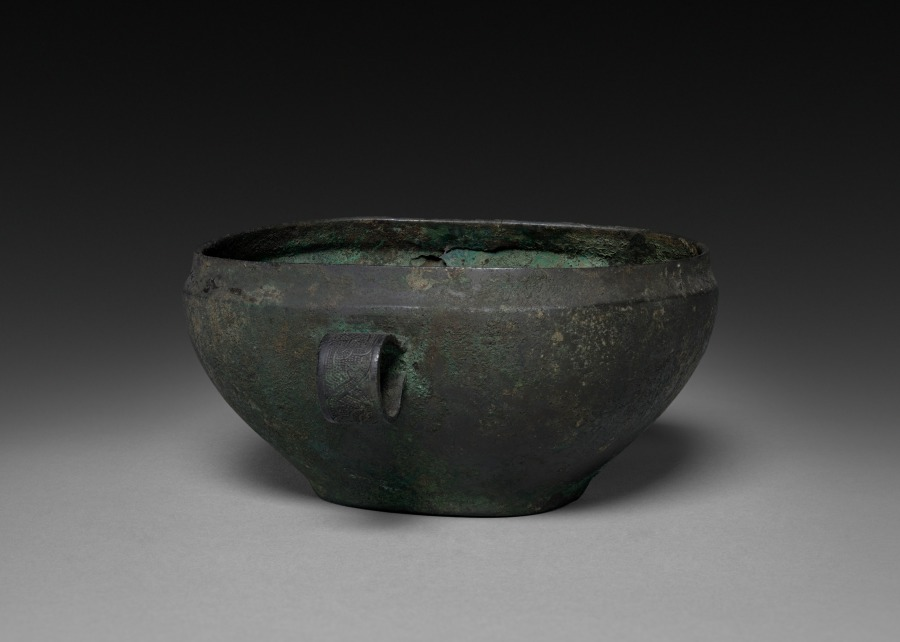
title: Bronze Dish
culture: China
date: before 1915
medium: bronze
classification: Metalwork